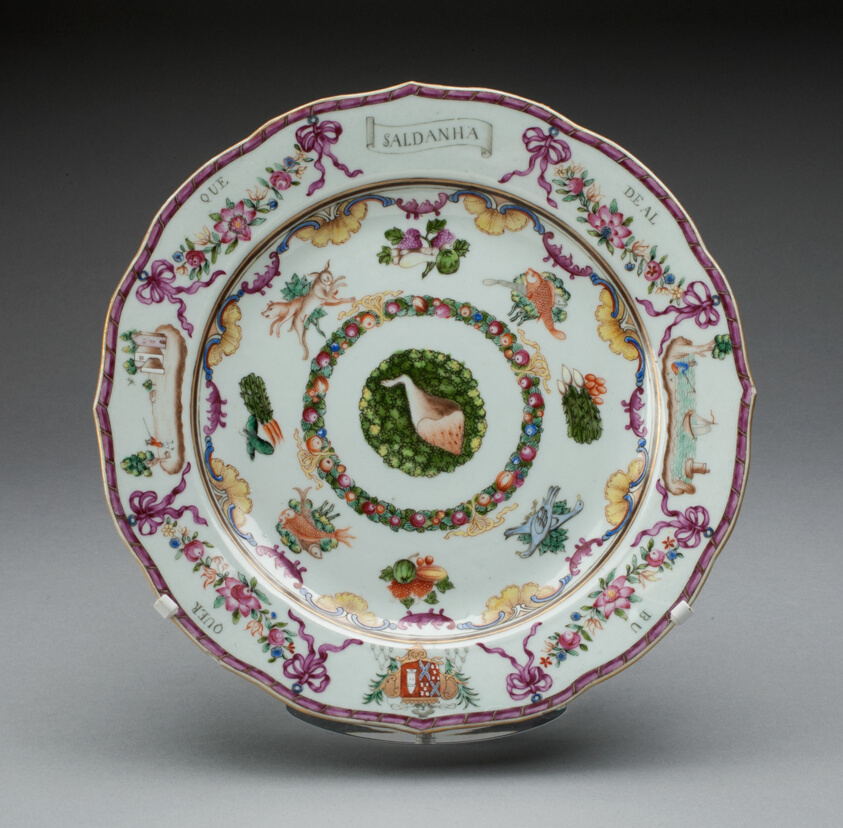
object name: Ceramics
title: Plate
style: chinese export, Chinese (culture or style), East Asian, asian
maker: China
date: 1760/70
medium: Hard-paste porcelain with polychrome enamels and gilding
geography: China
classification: plate (general, dish); dish (vessel); chinese export porcelain; porcelain; european decorative arts; ceramics